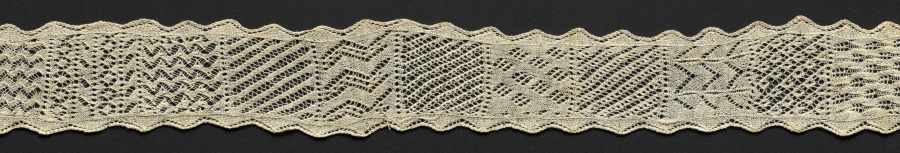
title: Knitted Lace Sampler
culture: Italy, Sienna, 19th century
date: 19th century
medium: knitted linen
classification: Sampler